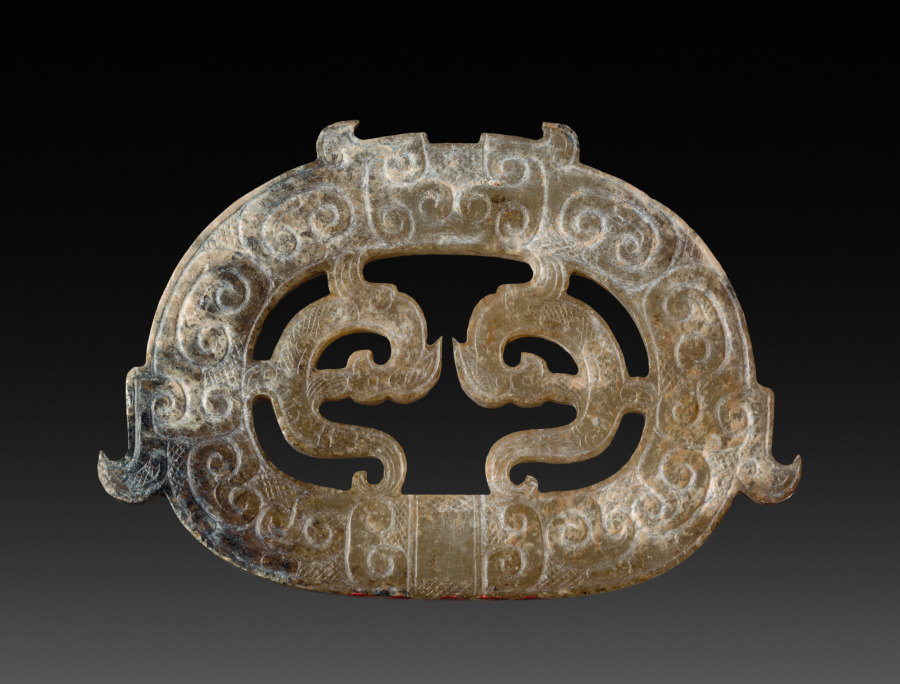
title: Double Dragon Plaque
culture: China, Eastern Zhou dynasty (770–256 BCE), Warring States period (475–221 BCE)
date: 475–221 BCE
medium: nephrite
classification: Jade